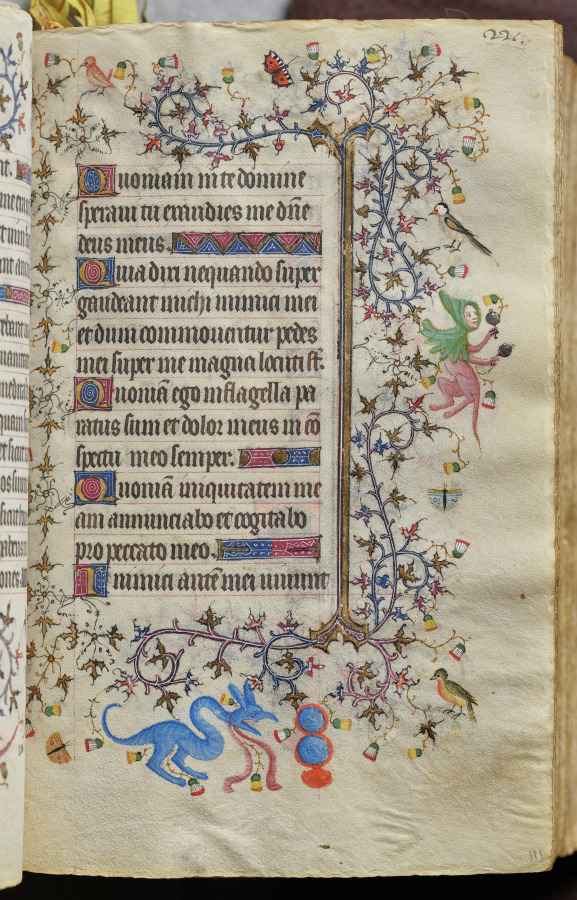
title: Hours of Charles the Noble, King of Navarre (1361-1425): fol. 111r, Text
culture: France, Paris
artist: Master of the Brussels Initials and Associates (French)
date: c. 1405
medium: ink, tempera, and gold on vellum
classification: Bound Volume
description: This precious volume was obviously highly prized by its owner, the French-born King of Navarre, who had his coat of arms painted on no less than twenty folios. Rather than directly commissioning this manuscript from a specific workshop, it seems that Charles the Noble acquired his book of hours -- perhaps ready-made for the luxury market -- while on a trip to Paris in 1404-05. A collaborative effort, six painting styles are evidenced within the pages of this codex, those of two Italians, two Frenchmen, and two Netherlanders. The painter who was responsible for the planning and decoration of the book, and who produced seventeen of the large miniatures, was a Bolognese artist known as the Master of the Brussels Initials. His principal assistant, responsible for most of the borders, was a Florentine who signed his name "Zecho" da Firenze on folio 208 verso.